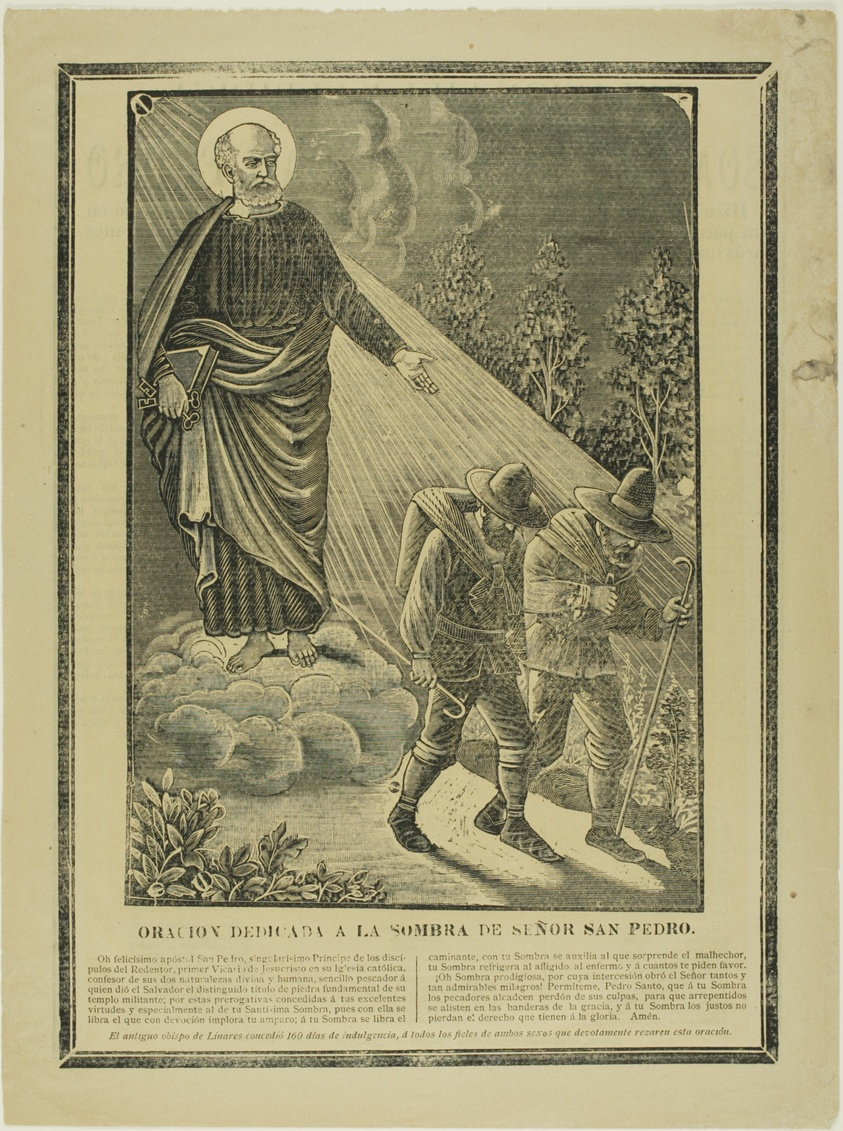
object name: Print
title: Prayer Dedicated to the Shadow of Saint Peter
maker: José Guadalupe Posada (Mexican, 1852-1913)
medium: Relief etching on paper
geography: Mexico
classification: relief etching; print; prints and drawing